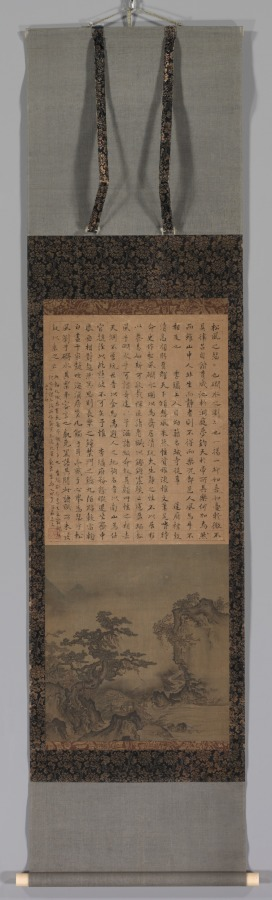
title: Landscape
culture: Japan, possibly Edo period (1615-1868)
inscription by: copy after Ishō Tokugan (Japanese, c. 1359–1437)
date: early 1600s to mid-1800s?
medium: hanging scroll; ink and slight color on paper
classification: Painting